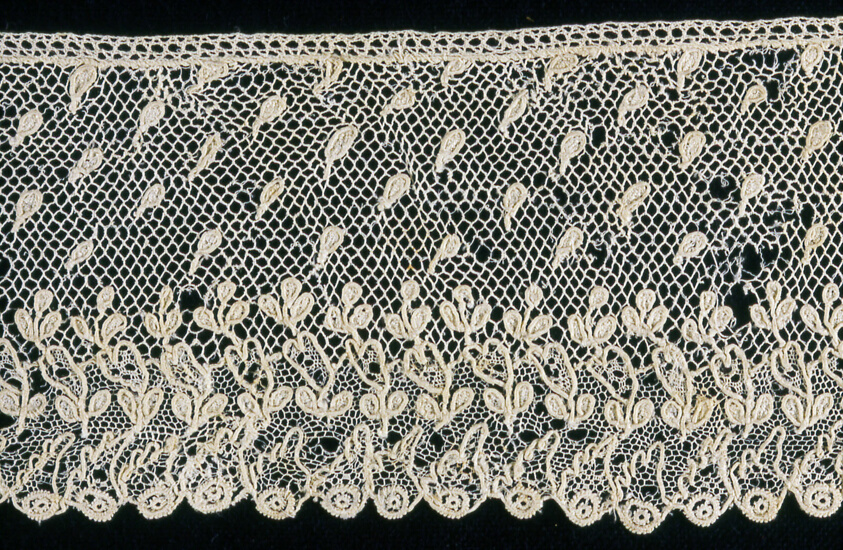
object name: Textile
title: Border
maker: France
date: 1775/1825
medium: Linen and horsehair, needle lace of a type known as "Point d'Argentan" with whipped mesh ground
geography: France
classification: textile; lace - needle; lace